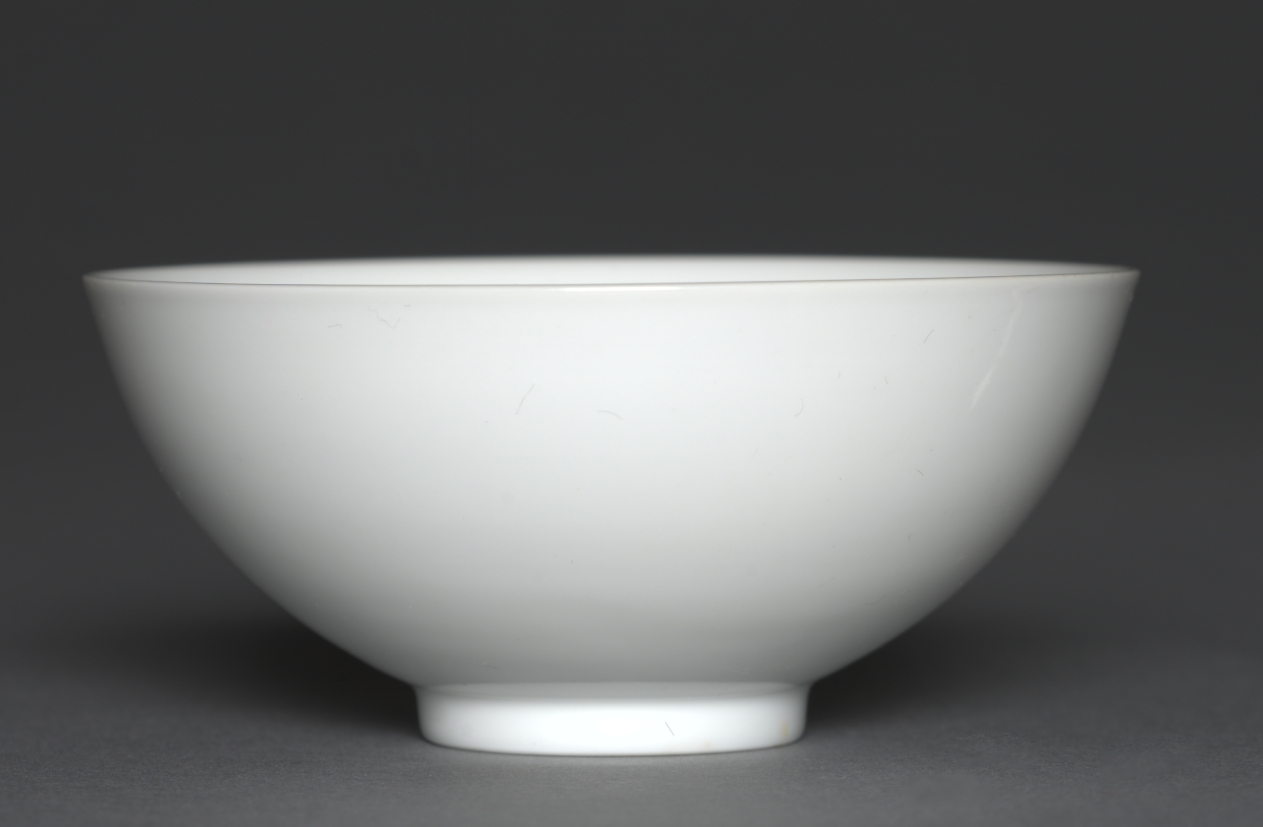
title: Bowl with Orchids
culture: China, Jiangxi province, Jingdezhen kilns, Qing dynasty (1644-1911), Qianlong mark and reign (1736-95)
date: 1736–1795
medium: porcelain with famille rose overglaze enamel decoration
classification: Ceramic